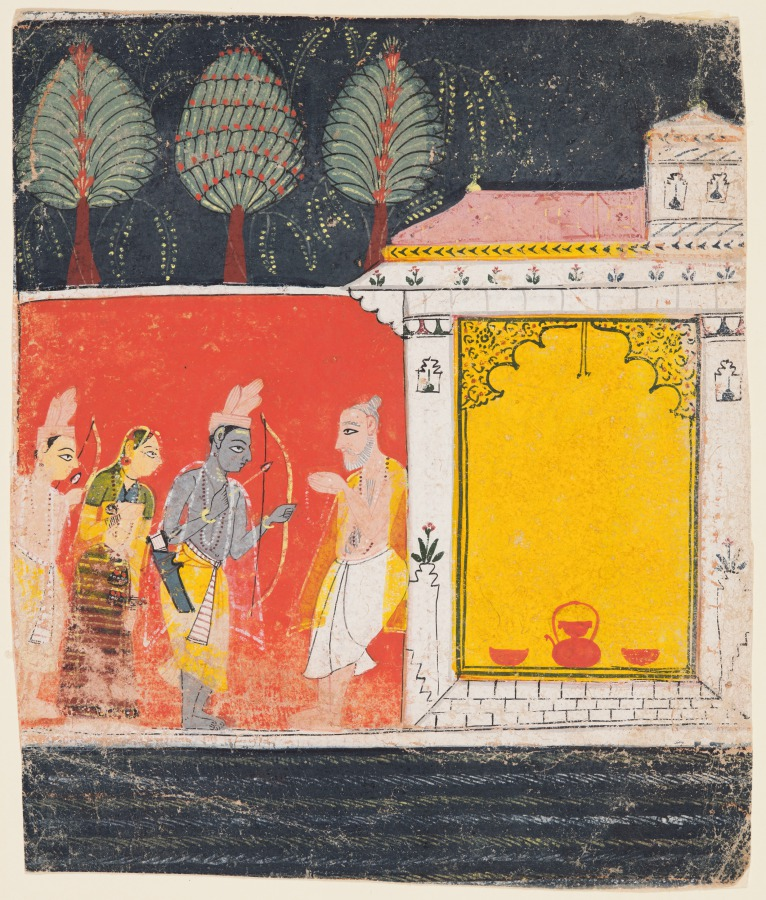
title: Rama, Sita, and Lakshmana visit the hermitage of the sage Bharadvaja at Prayaga, from Chapter 48 of the Ayodhya Kanda (Book of Ayodhya) of a Ramayana (Rama’s Journey)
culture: Central India, Malwa Region, Madhya Pradesh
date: c. 1650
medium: gum tempera, ink, and gold on paper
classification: Painting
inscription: [[verso]] nai sau śrī rāma ju bhārad vaja arsema gavanā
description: In a scene from their exile in the forest, the royal party arrives at the hermitage of a sage who greets him with folded hands. The blue Rama, his wife Sita, and his brother Lakshmana bow slightly in respect to the sage. The hermitage appears luxurious, with floral ornament inlaid in marble, bottles in niches, and an entrance similar to Mughal viewing windows.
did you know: Prayaga is the sacred site where the Ganges, Yamuna, and Sarasvati Rivers converge, formerly known as Allahabad.